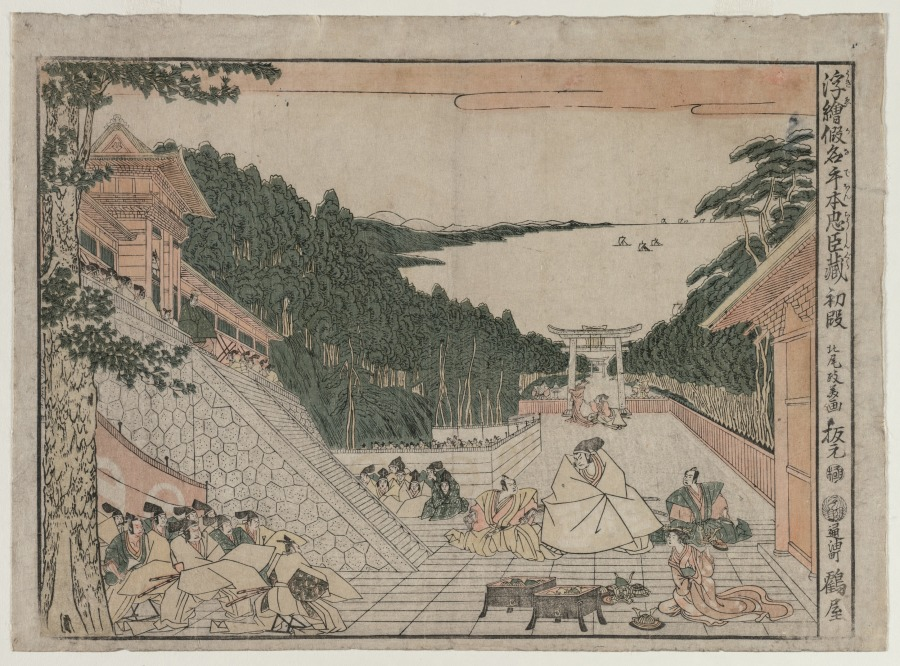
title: Chushingura: Act I (from the series Perspective Pictures for The Treasure House of Loyalty)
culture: Japan, Edo period (1615–1868)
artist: Kitao Masayoshi (Japanese, 1761–1824)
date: c. 1790s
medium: color woodblock print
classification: Print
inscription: Signature: Kitao Masayoshi ga Publisher: Tsuruya Kiemon (hammoto Toriaburacho Tsuruya, emblem) Censorship Seal: kiwame